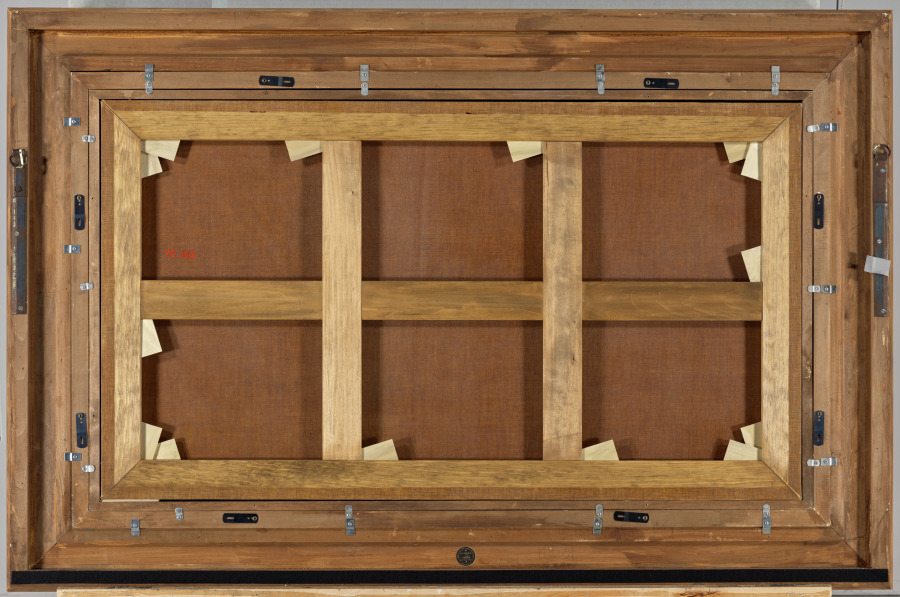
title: A Home in the Wilderness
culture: America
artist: Sanford Robinson Gifford (American, 1823–1880)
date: 1866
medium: oil on canvas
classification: Painting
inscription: Signed lower right: SR Gifford. 1866.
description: Gifford’s view of Mount Hayes in New Hampshire records human intrusion into a remote landscape. On the left riverbank a log cabin stands amid a recently cleared patch of land with several tree stumps, while figures in its doorway greet a man who has arrived with a canoe of supplies.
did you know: Gifford considered this painting to be one of his finest creations.